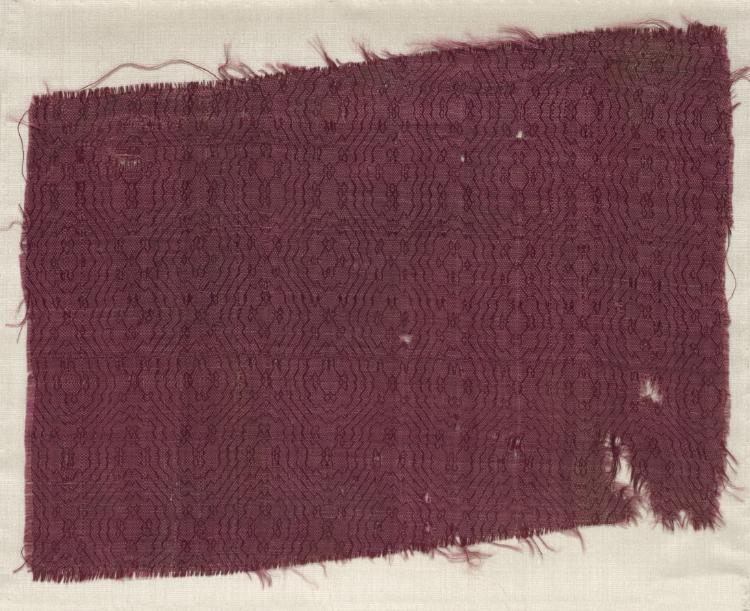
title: Fragment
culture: Spain, Islamic period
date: 1200s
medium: silk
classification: Textile